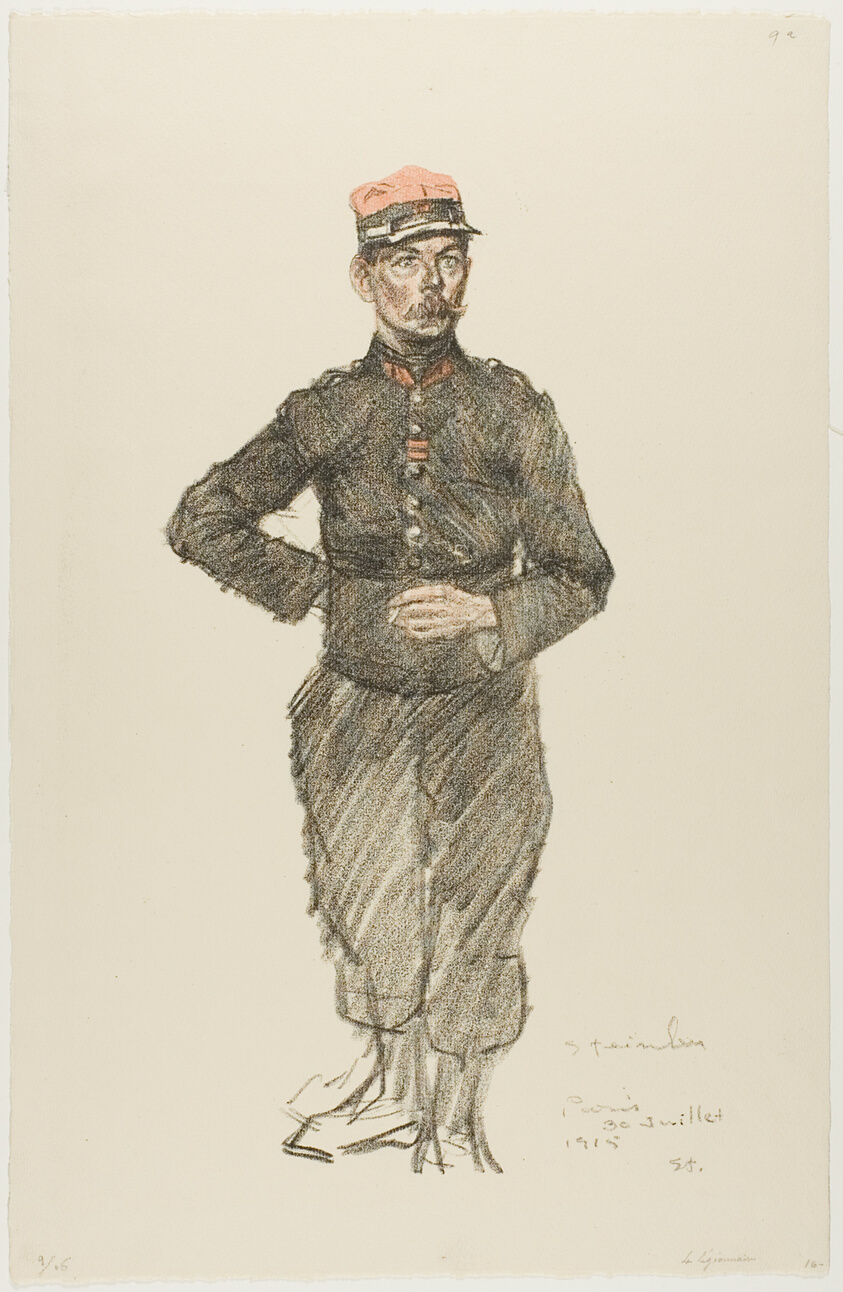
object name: Print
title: Legionnaire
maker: Théophile-Alexandre Steinlen; French, born Switzerland, 1859-1923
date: July 3, 1915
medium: Lithograph in red and black on cream laid paper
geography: France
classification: lithograph; print; prints and drawing